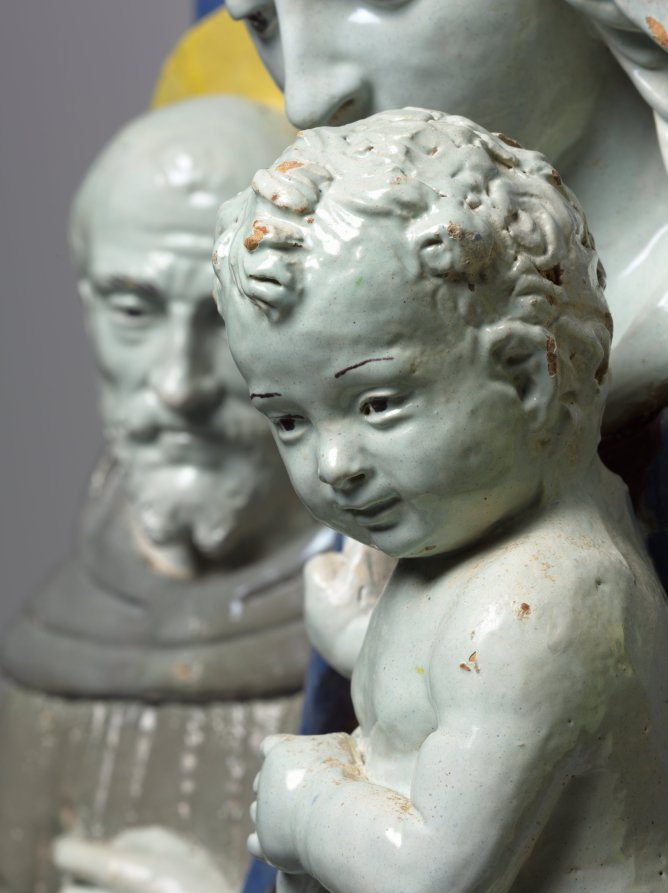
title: Virgin and Child Enthroned with Saints Francis and Giovanni Gualberto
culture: Italy, Florence, 16th century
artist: Benedetto Buglioni (Italian, 1461–1521)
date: c. 1510–20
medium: glazed terracotta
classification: Sculpture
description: The Madonna sits upon a throne with the Christ child standing on her knee. He is steadied by his mother, turning delicately to grasp her robe for support. On the left is Saint Francis, identified by his stigmata. On the right, Saint Giovanni Gualberto is identified by his monk's robe and distinctive processional cross. The brown robes of the saints, the purple of the Virgin's tunic, and the flesh tones of the figures contrast strongly against the bright blue background. In the semicircular sky behind the figures, three winged cherub heads emerge, representing a host of angels. Glazed terracotta is both durable and decorative and the gleaming white of this piece would have stood out in the darkness of a church. The medium was made popular by Renaissance artist Luca della Robbia and came into fashion as a substitute for expensive carved marble. A rounded arch frame embellished with fruit and flower garlands as well as egg-and-dart and cord moldings accompanied the work when it was acquired, but was later determined not to be original and removed. Buglioni's work bears the influence of the della Robbias, particularly in the simple color scheme. Buglioni likely worked in the studio of Luca's nephew, Andrea, where he would have learned the technique of glazing terracotta.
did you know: The unusual purple hue is particular to the artist.